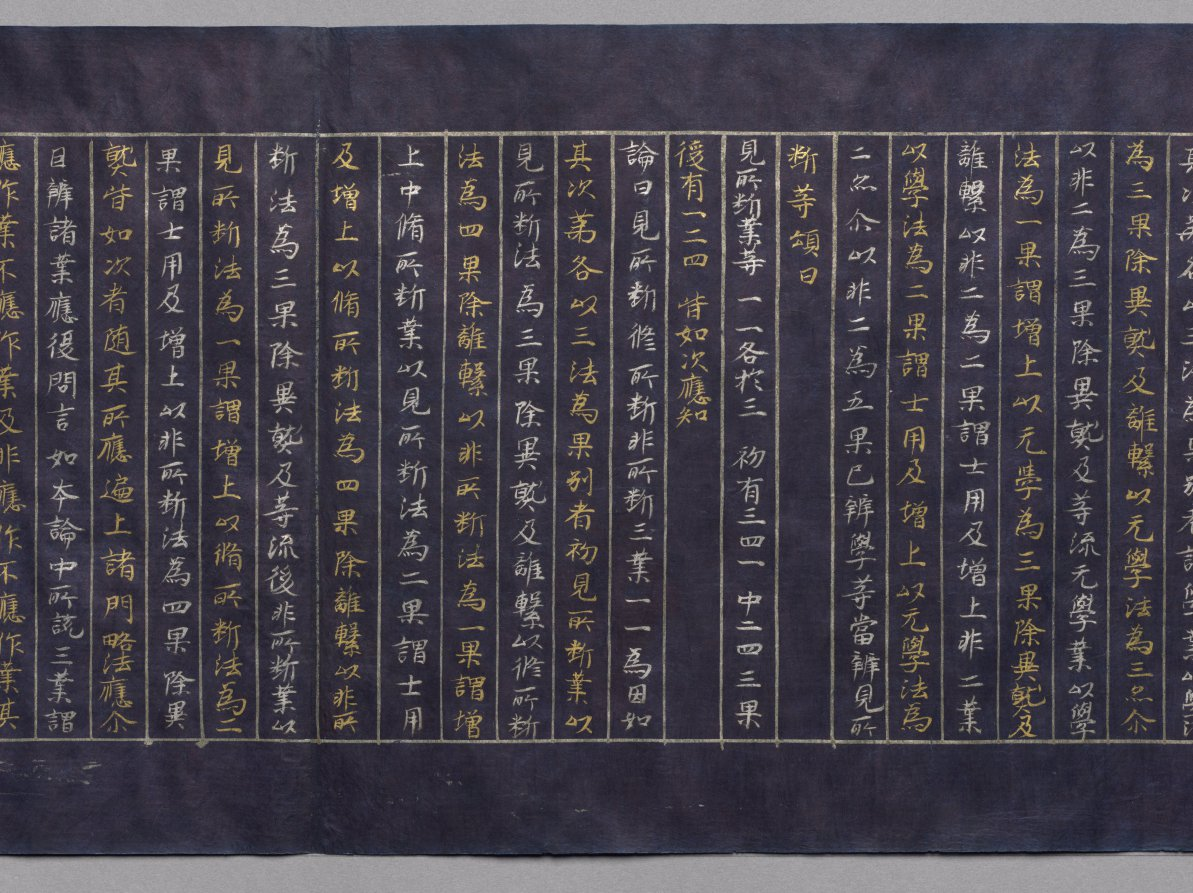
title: Meta-Discourse on the Teachings from the Treasury (Abidharmakosha-Bhashya)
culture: Japan, Heian period (794–1185)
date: 1100s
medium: handscroll; gold and silver on indigo-dyed paper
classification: Manuscript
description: This religious text relates some of the teachings of the great fourth-century Indian Buddhist scholar Vasubhandhu. The text analyzes human consciousness in its relationship to the environment and transformations that occur during meditation. This scroll is the 17th part of a 30-part translation of the text by Xuanzang, an eminent seventh-century Chinese monk.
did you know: The frontispiece depicts the Buddha Shakyamuni preaching in a paradisical landscape.